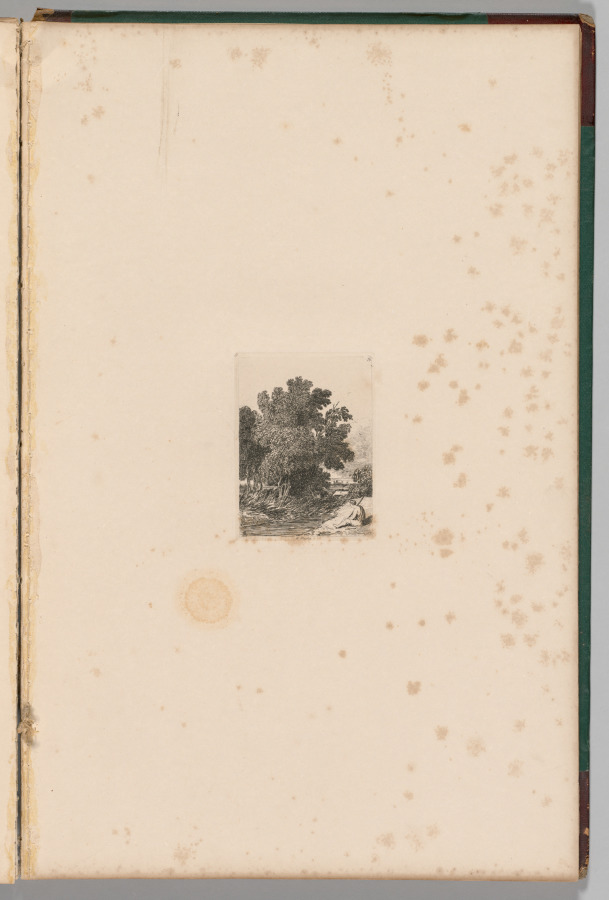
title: Liber Studiorum: Plate 16, A Study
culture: England, 19th century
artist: John Sell Cotman (British, 1782–1842)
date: 1838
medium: softground etching, from a bound volume containing 48 plates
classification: Bound Volume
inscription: In plate, within image, upper right: 16; in plate, lower left, within image: 1813; in plate, below image: A Study